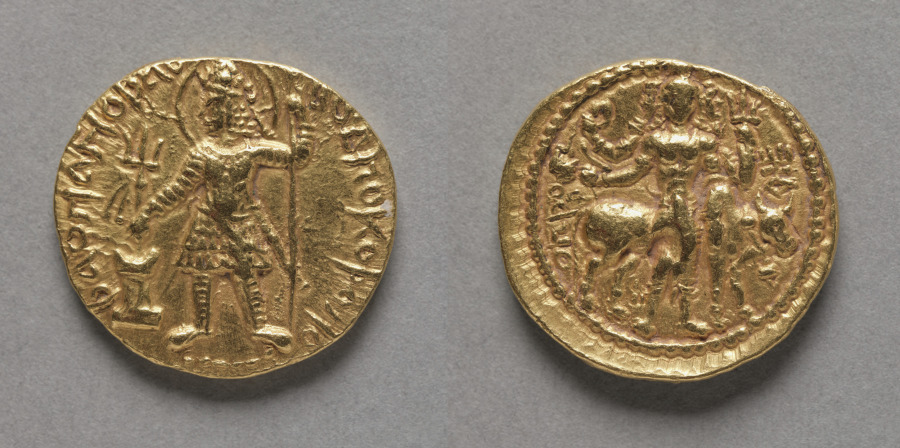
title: Coin of Kushan King Vasudeva I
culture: India, Mathura, Kushan period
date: c. 142/145+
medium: gold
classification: Coins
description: This gold coin represents the reign of the Kushana ruler, Vasudeva I. The coin bears a portrait of the ruler on the obverse and various deities on the reverse. It is identified by inscriptions in Kharosthi, the language used in northwestern India during the Kushan period.